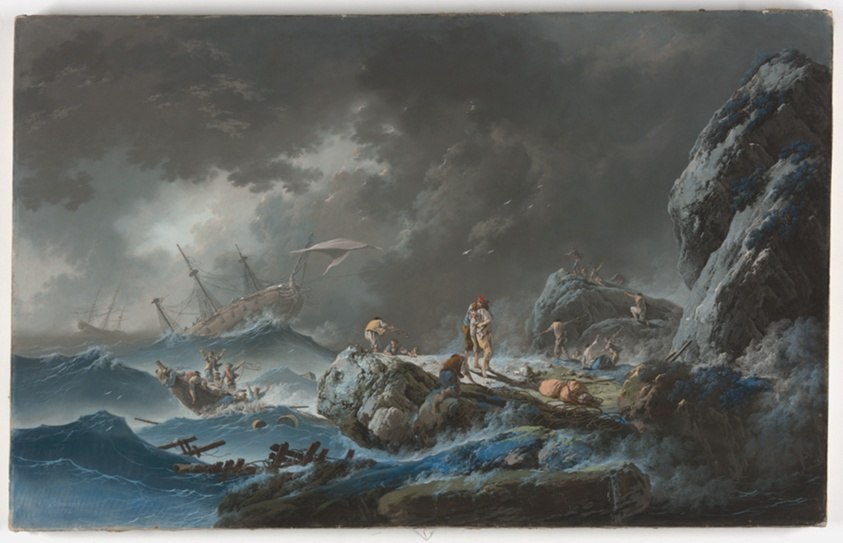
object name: Drawing and Watercolor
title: The Shipwreck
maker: Jean Baptiste Pillement (French, 1728-1808)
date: 1782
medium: Pastel on gessoed canvas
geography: France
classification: pastel; drawings (visual works); prints and drawing